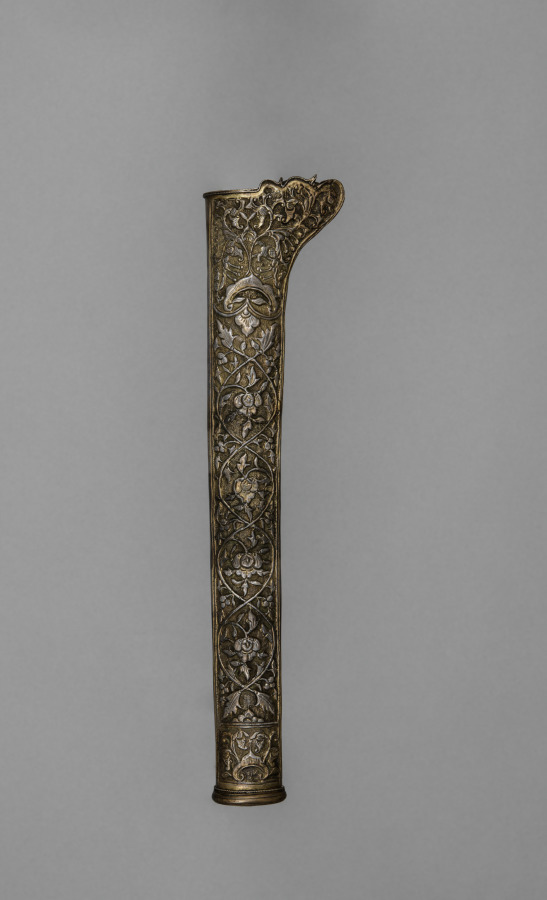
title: Scabbard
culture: Sri Lanka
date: 1500s–1800s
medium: gilt silver with wood core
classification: Arms and Armor